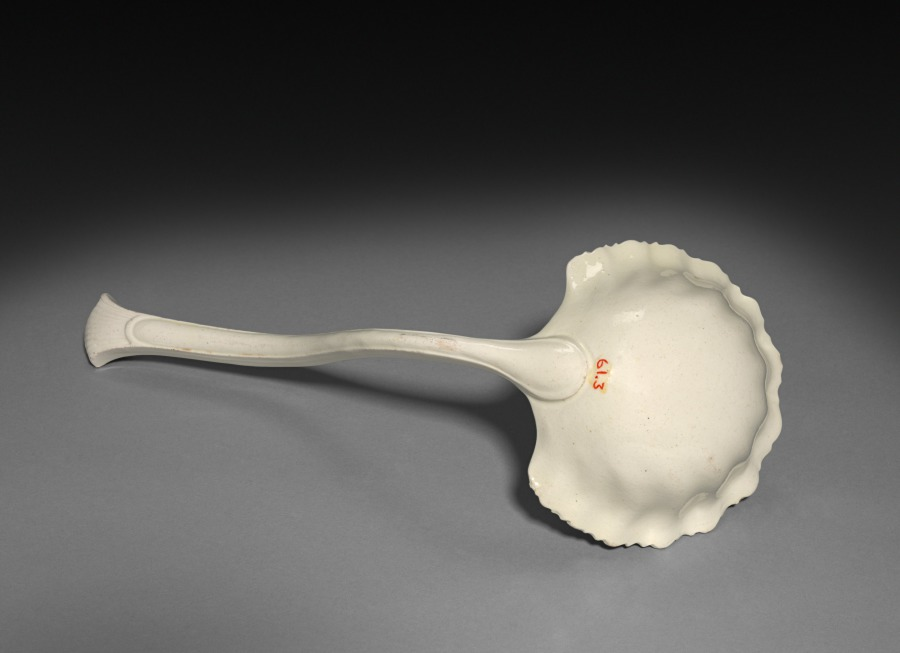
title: Ladle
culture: France, Pont-aux-Chous, 18th century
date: 1750–1775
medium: faience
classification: Ceramic